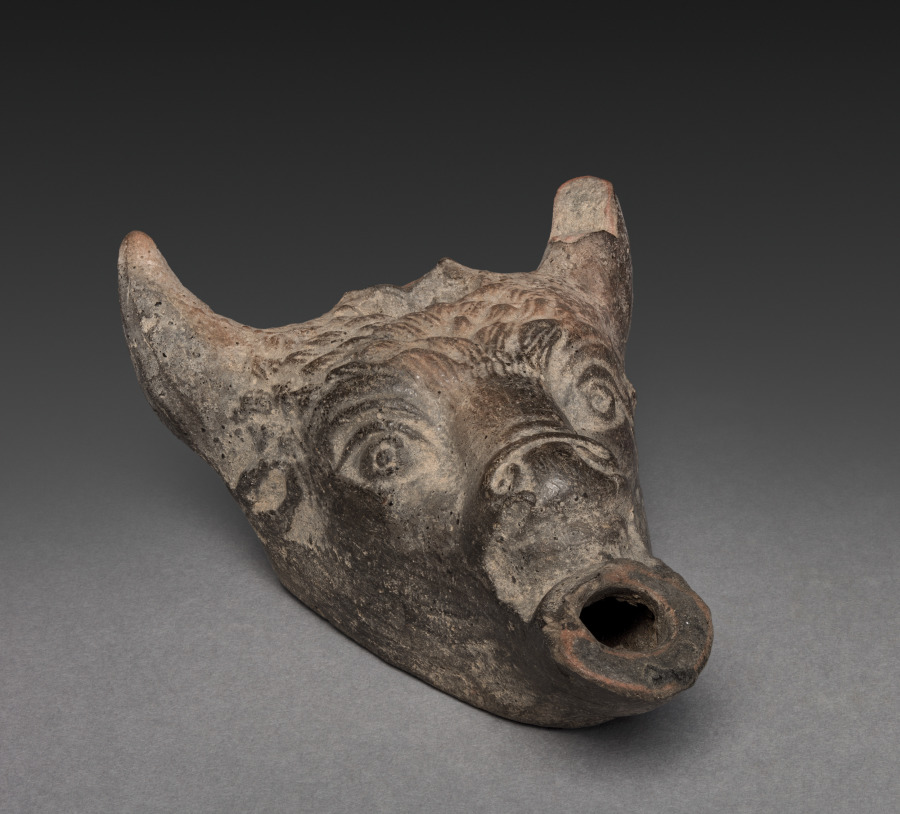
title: Bull's-head Lamp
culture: Greece, Greco-Roman Period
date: 100 BCE–100 CE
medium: Nile silt clay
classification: Vessels